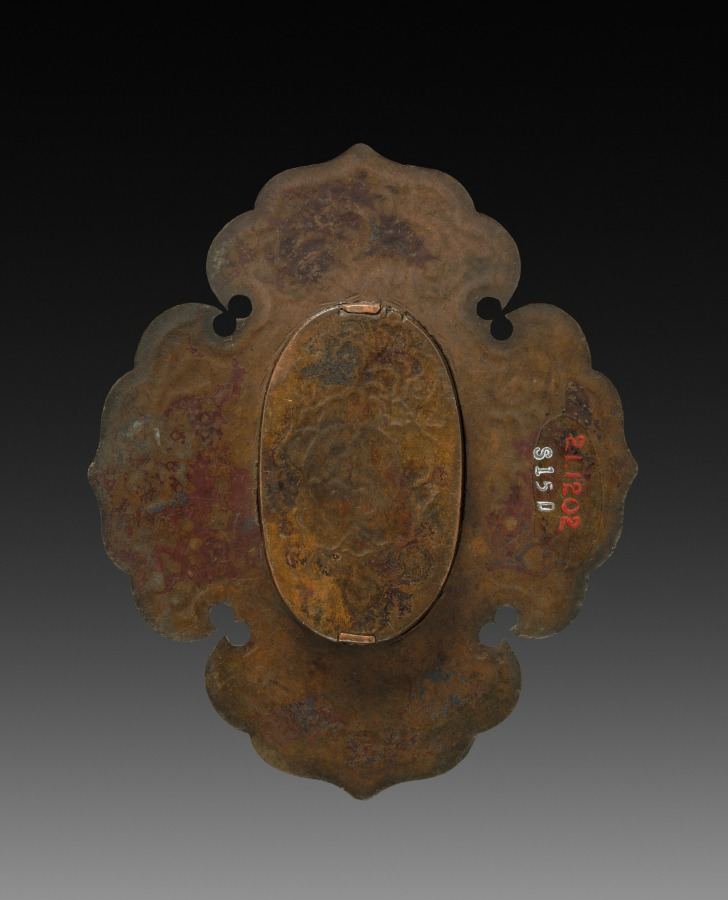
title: Door Pull (Hikite)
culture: Japan, Edo period (1615–1868)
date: early to mid-1800s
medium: gilt bronze (?)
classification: Metalwork